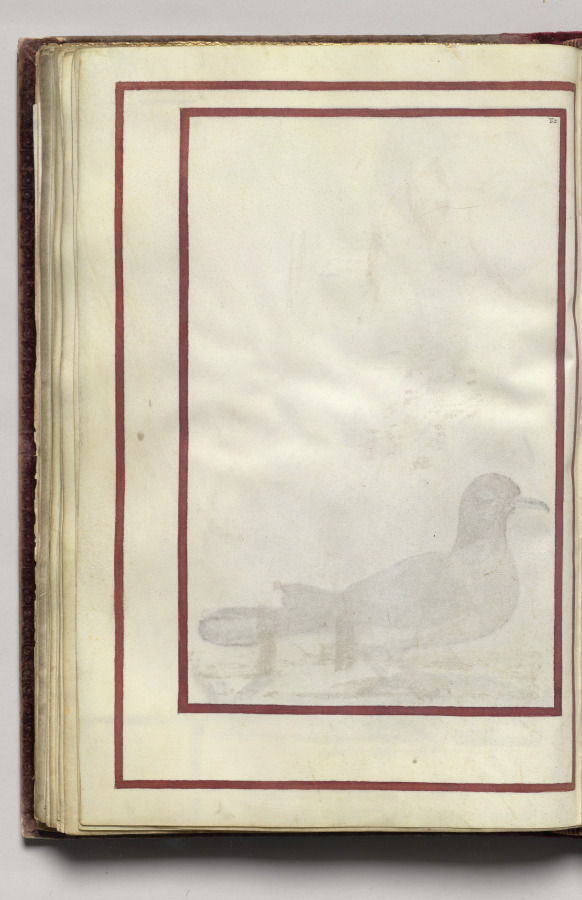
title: Border, folio 39 (verso), from Florilegium (A Book of Flower Studies)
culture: France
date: 1608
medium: watercolor, ink, silver and gold over occasional traces of pencil, on vellum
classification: Bound Volume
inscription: Dated: Poitiers 1608 (on frontispiece) Signed: On frontispiece in black ink, lower right: Van Kuyk Notation on drawing: Frontispiece: in pencil, lower margin: * élève de Van Kessel, peintre flammand (* in pencil also appears in front of Van Kuyk's name).